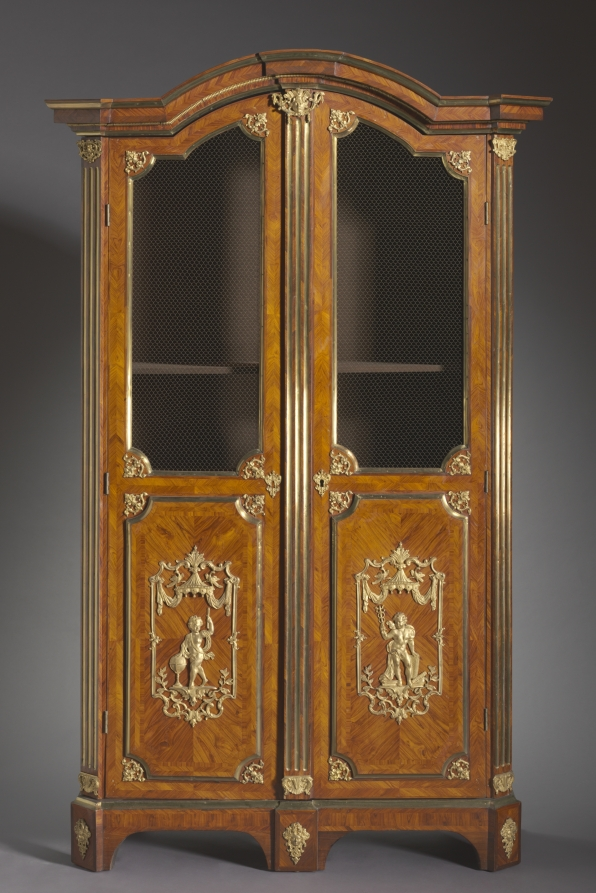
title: Bookcase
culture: France, 18th century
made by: attributed to Charles Cressent (French, 1685–1768)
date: c. 1720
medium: Kingwood and rosewood veneers, gilt metal mounts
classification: Furniture and woodwork